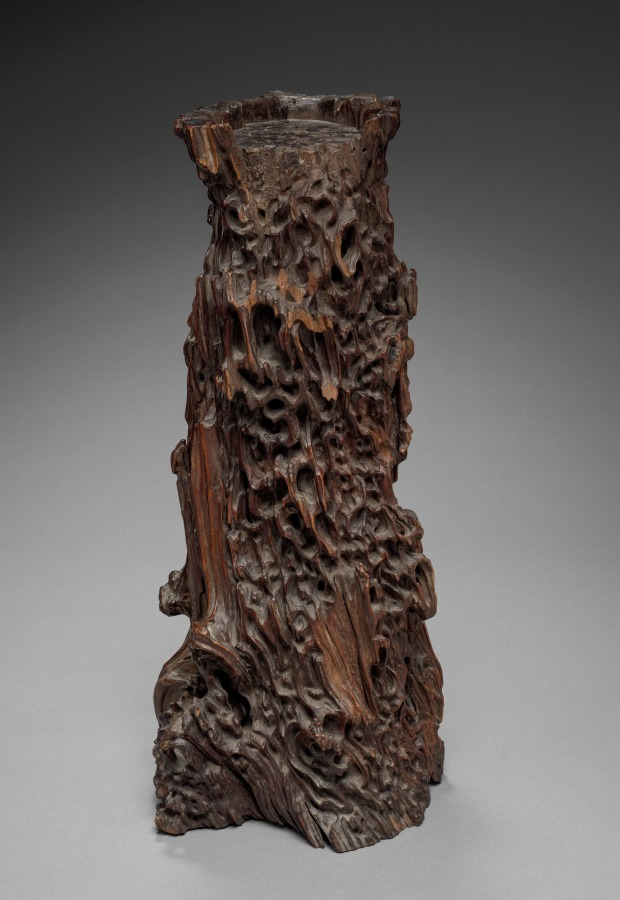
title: Prunus Wood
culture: China, Qing dynasty (1644-1911)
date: 1700–1899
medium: wood carving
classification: Wood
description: The gnarled and twisted form of a prunus stump is carved to accentuate its naturally textured surface. The body is finely polished to create a lustrous patina. Simple wood carvings like this exemplify the Chinese scholars’ taste for natural forms and rustic materials, which in turn reflect the desire to retreat into nature. They were collected and displayed as decorative works of art in the traditional scholars’ studios.